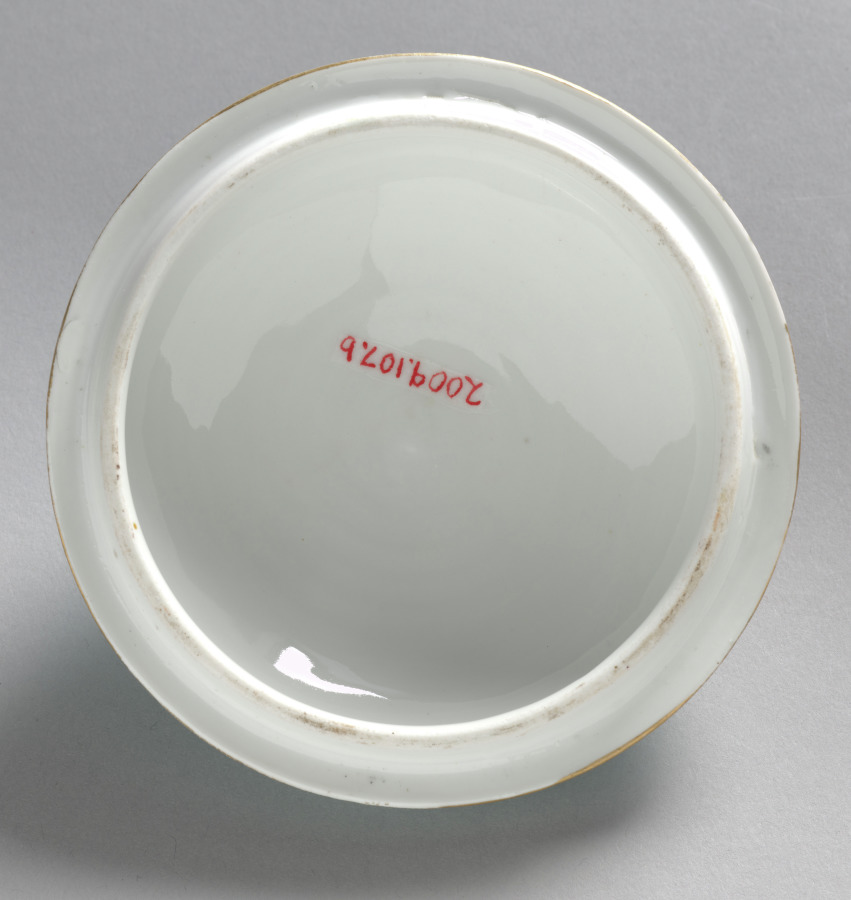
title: Cover for a Sugar Bowl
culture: Germany, Meissen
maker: Meissen Porcelain Factory (German, est. c. 1710)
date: c. 1750–70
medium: porcelain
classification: Ceramic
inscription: Half moon mark on the bottom.